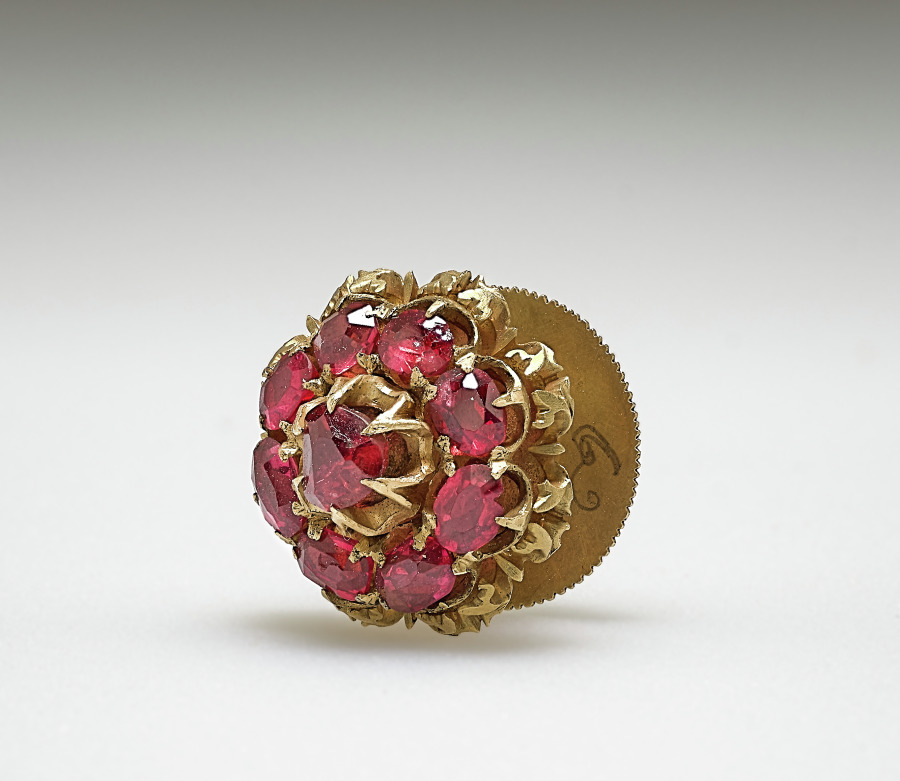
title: Earring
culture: Burma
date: 1800s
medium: gold and rubies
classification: Jewelry